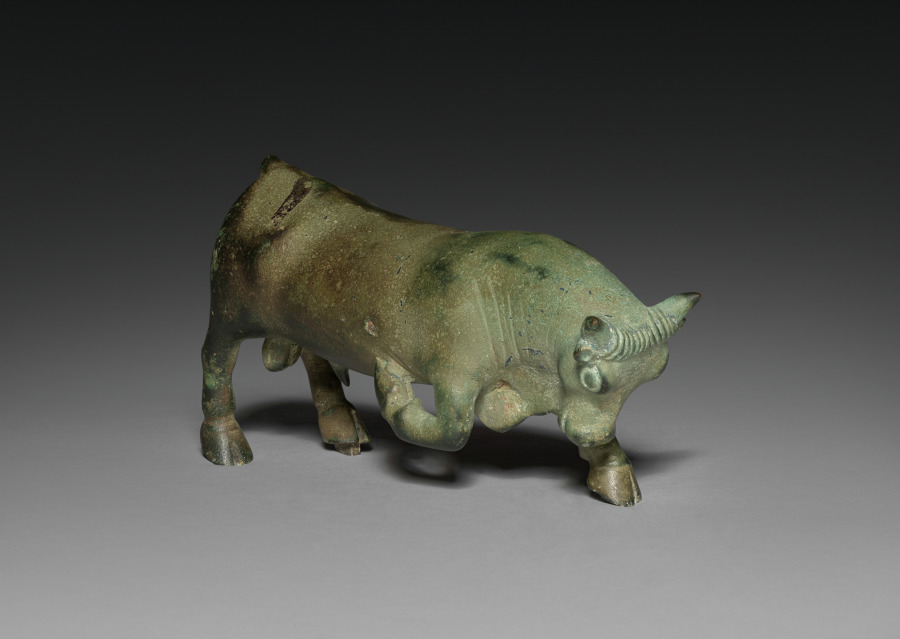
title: Pawing Bull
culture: South Italy, Lucania, Greek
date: 500–475 BCE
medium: bronze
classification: Sculpture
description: With its head slightly lowered and right foreleg raised in a pawing motion, this robust bull seems poised for action. The pose closely resembles that of bulls on coins minted at Thurii, a Greek colony in South Italy, but the statuette seems earlier in date and could have other associations. Perhaps the bull once carried the princess Europa, for example, or battled a lion or a hero. Alternatively, it may have stood alone as a small-scale offering, representing the actual bulls sometimes sacrificed to deities.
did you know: This solid-cast bronze bull is nearly intact, missing only its tail.